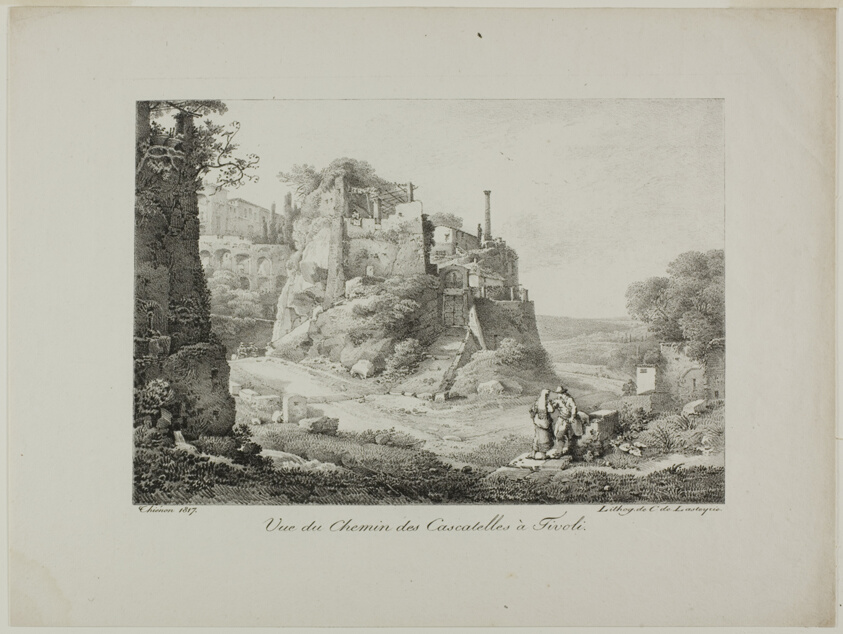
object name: Print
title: View of the Road from Cascatelles to Tivoli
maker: Claude Thienon (French, 1772-1846); printed by Comte de Charles Philibert Lasteyrie du Saillant (French, 1759-1849)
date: 1817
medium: Lithograph in black on ivory wove paper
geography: France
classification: lithograph; print; prints and drawing